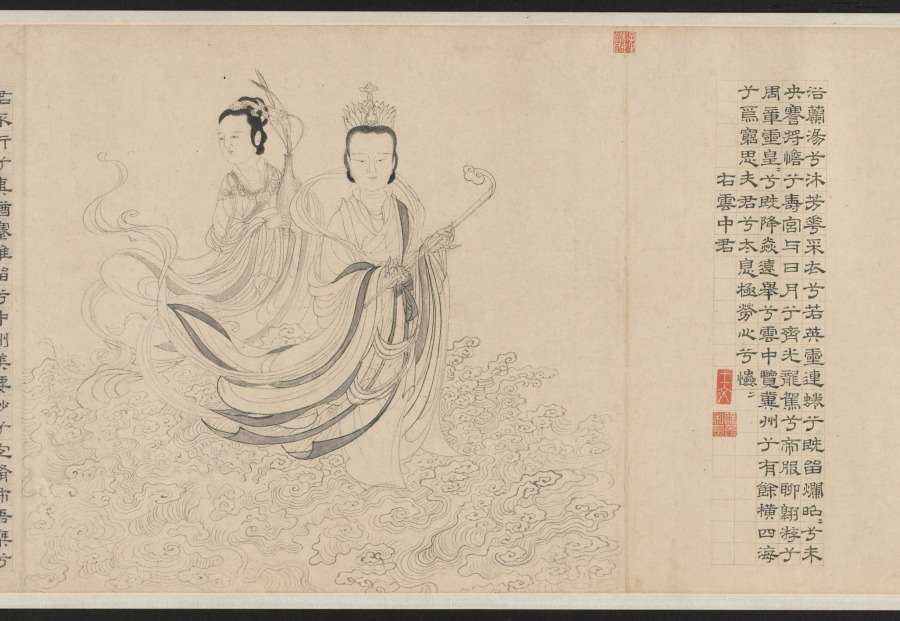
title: Nine Songs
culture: China, Yuan dynasty (1271-1368)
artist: Zhang Wo (Chinese, active c.1336–after 1364)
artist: Chu Huan (Chinese, active 1361)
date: 1361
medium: handscroll; ink on paper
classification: Painting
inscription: 7 colophons and 47 seals: 1 colophon, dated 1361, and 28 seals of Chu Huan 褚奐 (active c. 1361); 1 colophon, dated 1785, and 1 seal of Lu Shihua 陸時化 (1714-1779); 2 seals of Lu Yü-ch'ing (18th c.); 1 colophon, dated 1935, of Ye Gongchuo 葉恭綽 (1881-1968); 1 colophon, dated 1935, of Wu Hufan 吳湖帆(1894–1968); 1 colophon, dated 1938, and 1 seal of Wang Tongyu 王同愈 (1856-1941); 1 colophon, dated 1941, of Wu Huayuan 吳華源 (1893-1972); 1 colophon, dated 1942, and 9 seals of Xu Bangda 徐邦達 (1911–2012); 1 colophon, dated 1942, of Lang Jingshan 郎靜山 (1892-1995); 1 colophon, dated 1944, of Tang Yun 唐雲 (1910-1993); 6 seals of Wang Jiqian [C.C. Wang] 王季遷 (1907–2003).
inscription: Text of The Nine Songs written by Chu Huan at the end of each section.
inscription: 右離騷九歌圖，宋龍溟居士李公本，淮南張渥叔厚所畫妙絕當世。家藏請予書其辭目識于左。至正二十一年辛醜三月旦河南褚奐記。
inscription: Colophon by Lu Shihua 陸時化 (1714–1789): This scroll is fortunate to have been handed down from collections of the right people. Now, after 500 years, its condition is as good as when it was painted. I acquired this from Mr. Shen Guiyu [1673-1769], the President of the Board of Rites. The label is in his handwriting when he was 95 years old. I submit that Chu Huan (t. Shiwen) of the Yuan Dynasty was a native of Qiantang. His "seal" and li writings are in the style of Wu Rui. For example, in [Chu Kuei's] Ming ji lu [A list of masterpieces] is recorded the stele commemorating the restoration of the prefectural school of Kun-shan, the text of which was composed by Yang Weizhen in the twenty-first year of Zhizheng [1361]; and the calligraphy as well as the title in li style was by Chu Huan, who was at that time an assistant judge of the prefecture of Haining in the circuit of Hangzhou. Zhang Wo's zi is Shuhou (叔厚). His literary name is Zhen Qisheng (贞期生). According to [Gu Ying's] Yu shan cao tang ya jii, he liked to paint in the bai-miao or the "pure delineation" style after the method of Li Longmian [Li Gonglin 李公麟], which finds no peer among the ancient masters. This is agreed upon [by Pei Ch'iung] in his Qing jiang zhi who praised [Zhang Wo] as being quite learned and well-versed in many branches of the arts, especially figure painting. Recorded by Lu Shihua [The mountain dweller], listening to the pine, in the twelfth month of the yisi year [1785].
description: Painted in the baimiao, or fine-line drawing style, this ancient work demonstrates the literati’s use of abstract calligraphic brushwork for self-expression. The subject of the “Nine Songs”—songs associated with shamanistic rituals in the ancient Chu kingdom—had traditionally provided artists with myths and legends that they could explore and reinterpret in their own works.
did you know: Divided into eleven sections, the scroll contains illustrations by painter Zhang Wu followed by a transcription of the relevant verse by calligrapher Chu Huan.